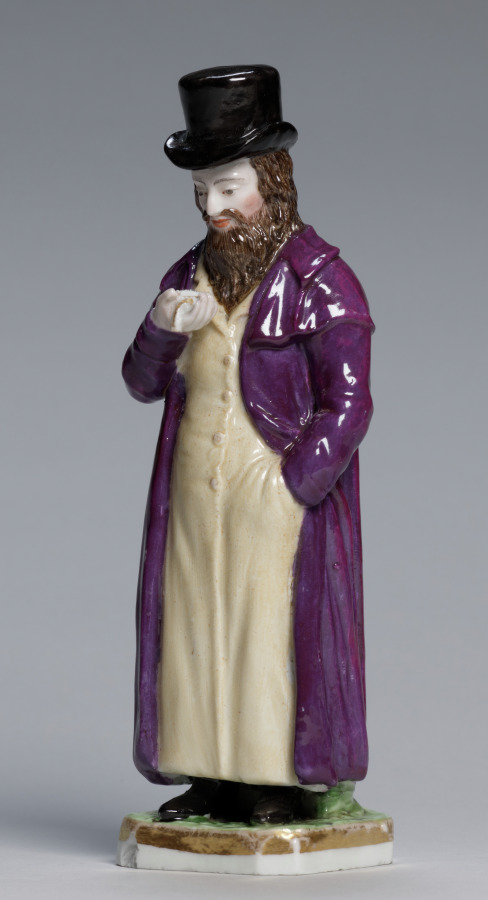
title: Man Holding a Watch (The Buyer)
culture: Russia, Moscow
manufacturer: Gardner Factory (Russian)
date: c. 1820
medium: porcelain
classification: Ceramic